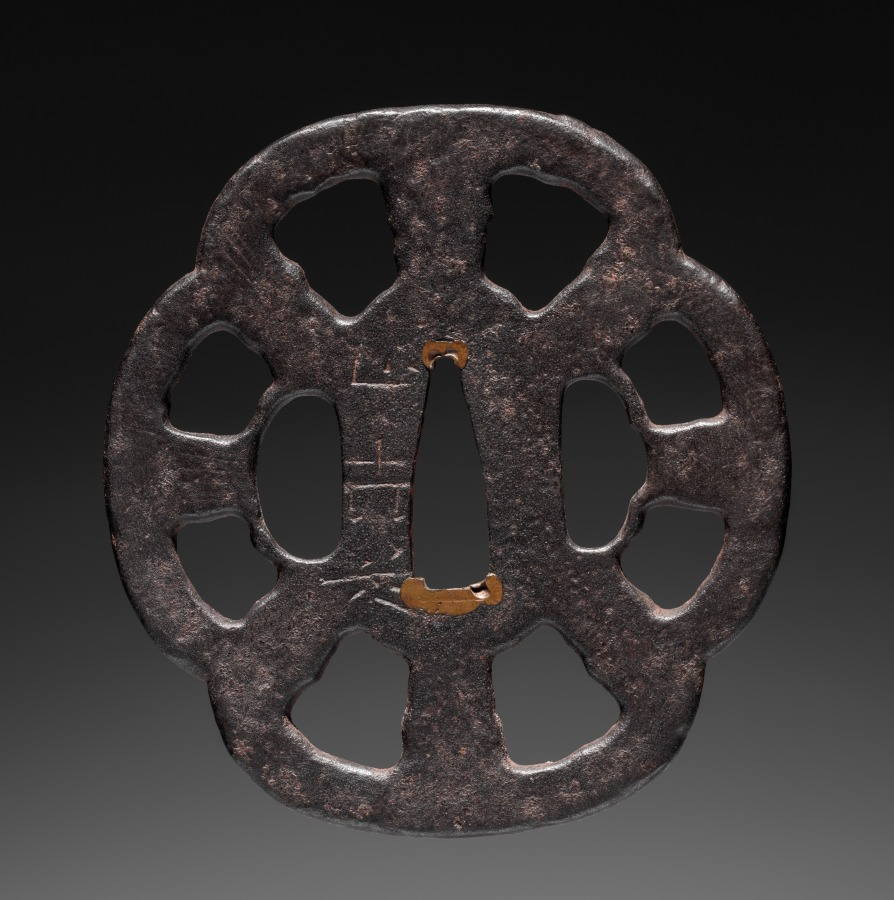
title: Sword Guard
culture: Japan, Edo period (1615–1868)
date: mid-1800s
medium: iron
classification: Arms and Armor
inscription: Signature: Norisuke, residing at Futago-yama, Bifu, copied